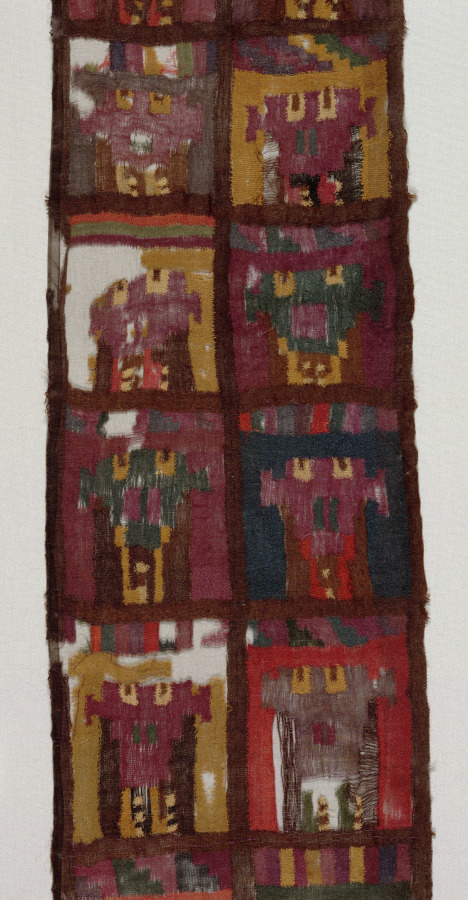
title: Band with Trophy Heads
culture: Peru, South Coast, Nasca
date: 100 BCE–700 CE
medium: interlocking warp and weft, single interlock: wool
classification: Textile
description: This band, remarkable for its intense color and spider-web sheerness, was created using an unusual technique known as discontinuous warp and weft. That is, none of the vertical or horizontal yarns are continuous from one side of the band to the other. Rather, they travel back and forth within their own color areas, linking at the edges with yarns in adjacent areas. This is a difficult feat when weaving on a loom and the creator likely used another approach, such as darning with a needle over a ground cloth that was then removed. The image repeated in each of the band’s rectangles is a head supported on two little feet.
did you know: This band is made in with a weaving technique that is unique to the ancient Andes.